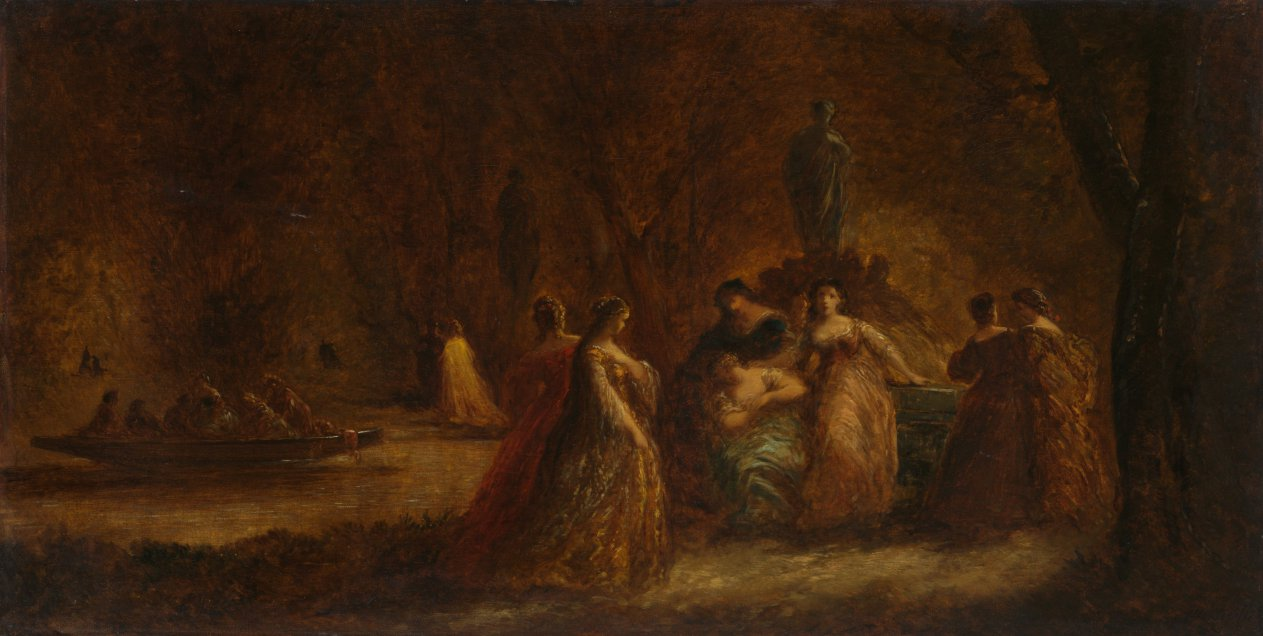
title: A Woodland Fête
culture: France, 19th century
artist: Adolphe Monticelli (French, 1824–1886)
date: c. 1853–1857 or c. 1862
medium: oil on fabric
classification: Painting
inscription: Signed lower right: Monticelli